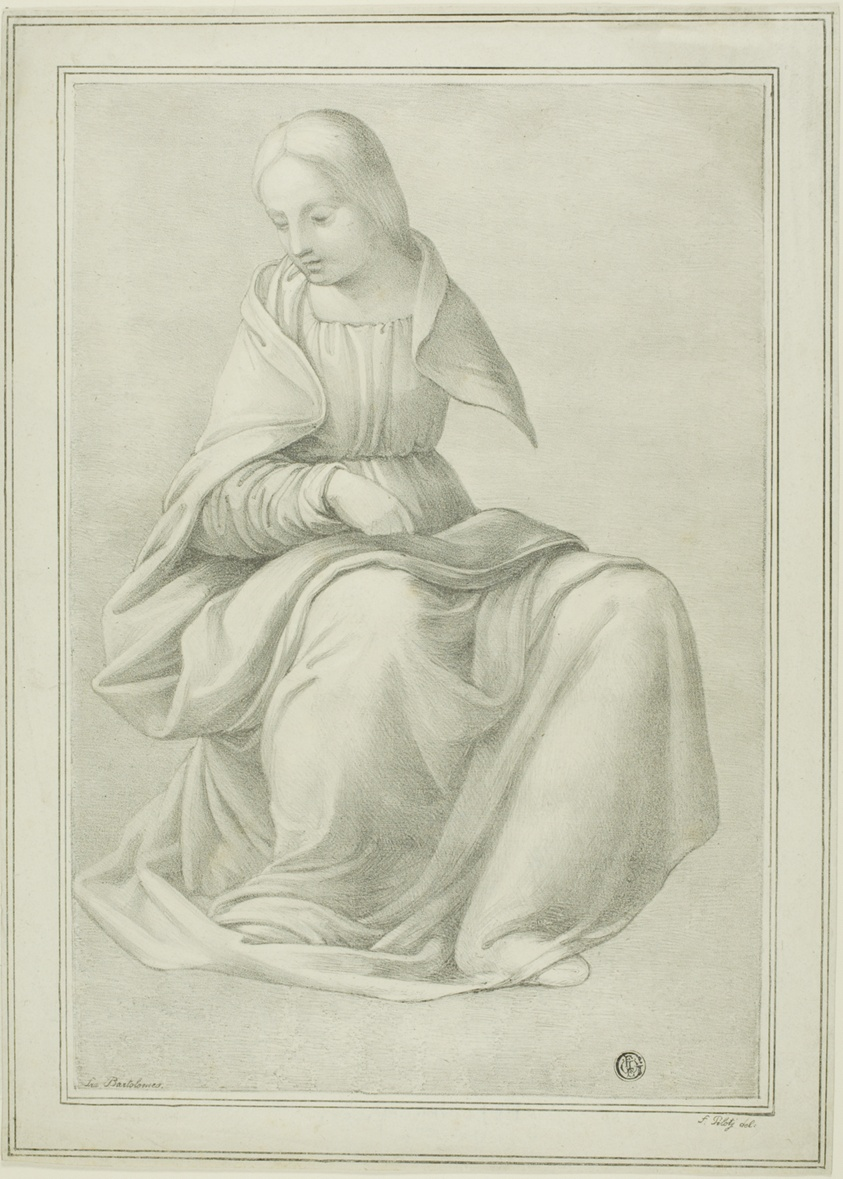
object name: Print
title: Study for Seated Figure of a Woman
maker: Ferdinand Piloty (German, 1785-1844); after Fra Bartolomeo (Italian, 1472-1517)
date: c. 1810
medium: Lithograph in black on paper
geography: Germany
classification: lithograph; print; prints and drawing